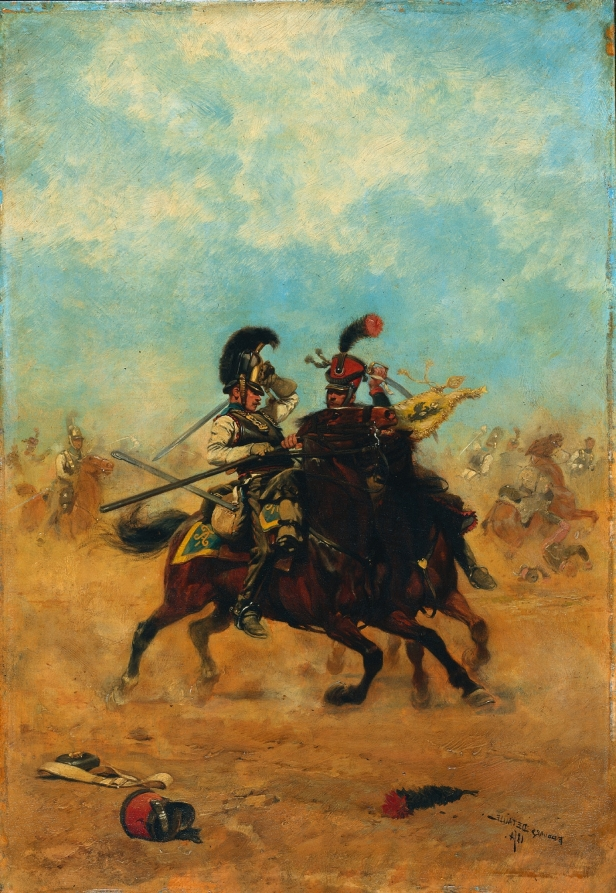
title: Combat for the Colors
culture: France, 19th century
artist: Édouard Detaille (French, 1848–1912)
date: 1874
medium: oil on wood panel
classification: Painting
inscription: Signed in black paint lower left corner: edouard detaille / 1874